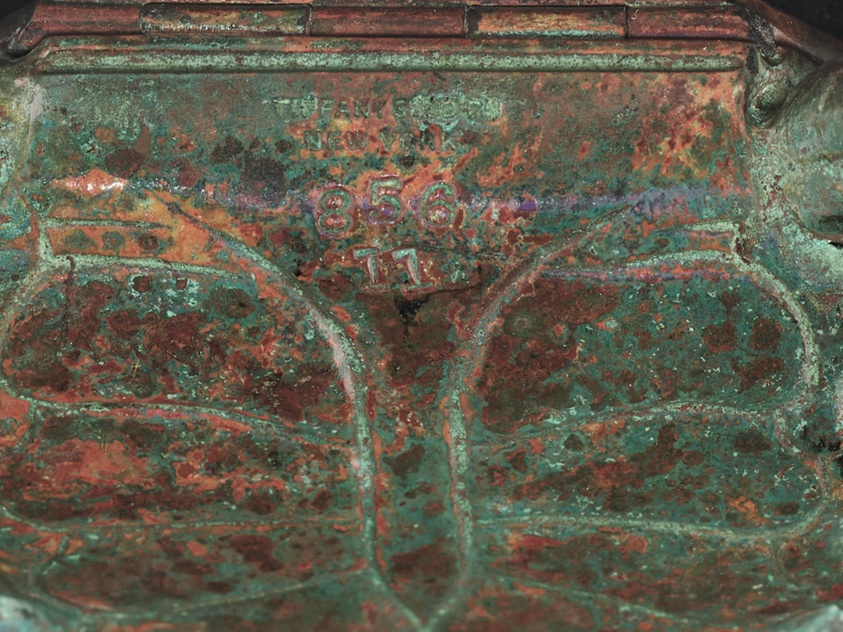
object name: Metalwork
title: “Crab” Inkstand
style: Arts and Crafts Movement, 20th Century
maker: Tiffany Studios (American, 1902–32); Corona, New York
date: c. 1905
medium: Bronze, Favrile glass, and shell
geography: Corona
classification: inkwells; inkwell liners; inkstand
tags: crabs, shells